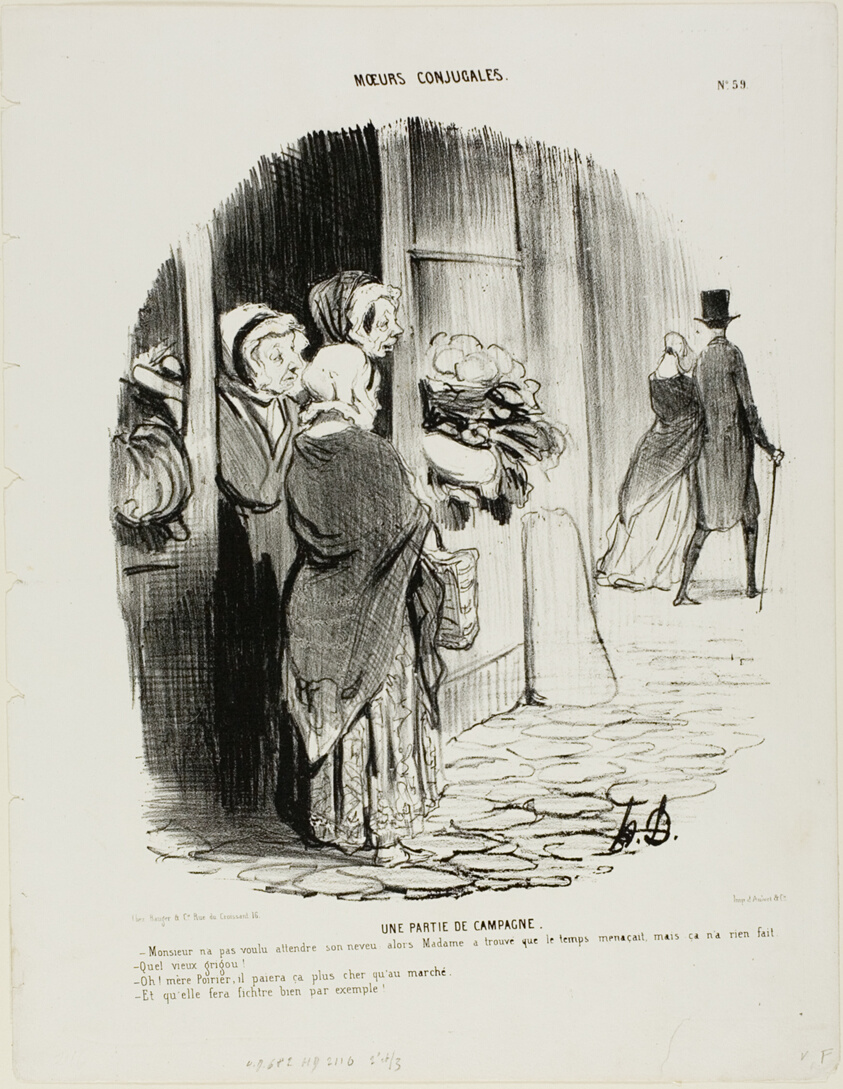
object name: Print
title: Country Amusement. “- Monsieur did not want to wait for his nephew; and Madame thought it might soon start raining, but he didn't really bother. - What an old miser! - Don't you worry, Mother Poirier, he'll pay dearly for that... more than the market price! - And right she is isn't she!,” plate 59 from Moeurs Conjugales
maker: Honoré Victorin Daumier; French, 1808-1879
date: 1842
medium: Lithograph in black on white wove paper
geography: France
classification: lithograph; print; prints and drawing